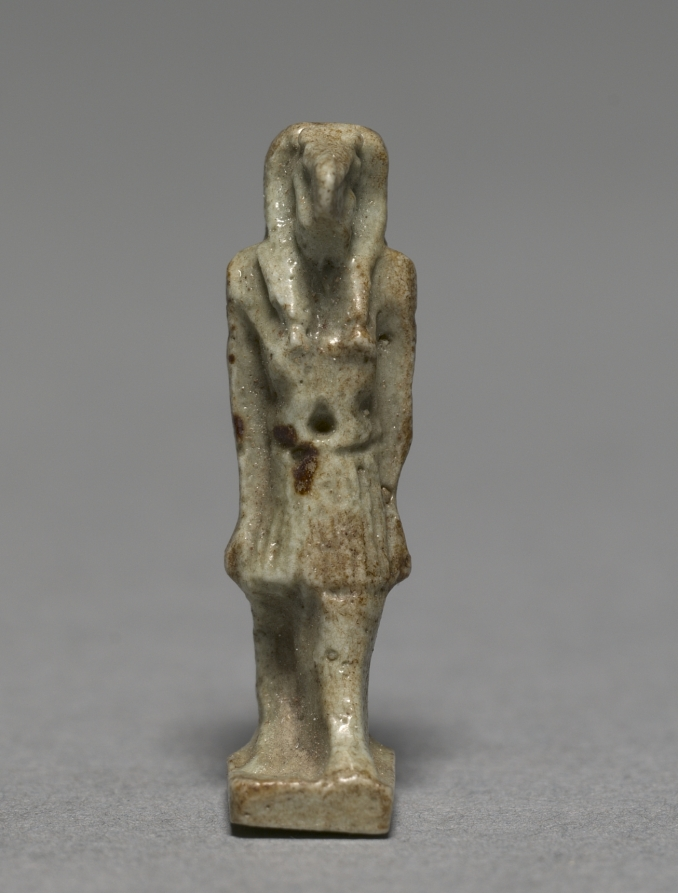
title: Amulet of Thoth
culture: Egypt, Late period (715–332 BCE), Dynasty 30–Greco-Roman period (332 BCE–395 CE), Ptolemaic dynasty (305–30 BCE)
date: 380–30 BCE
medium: gray green faience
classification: Amulets